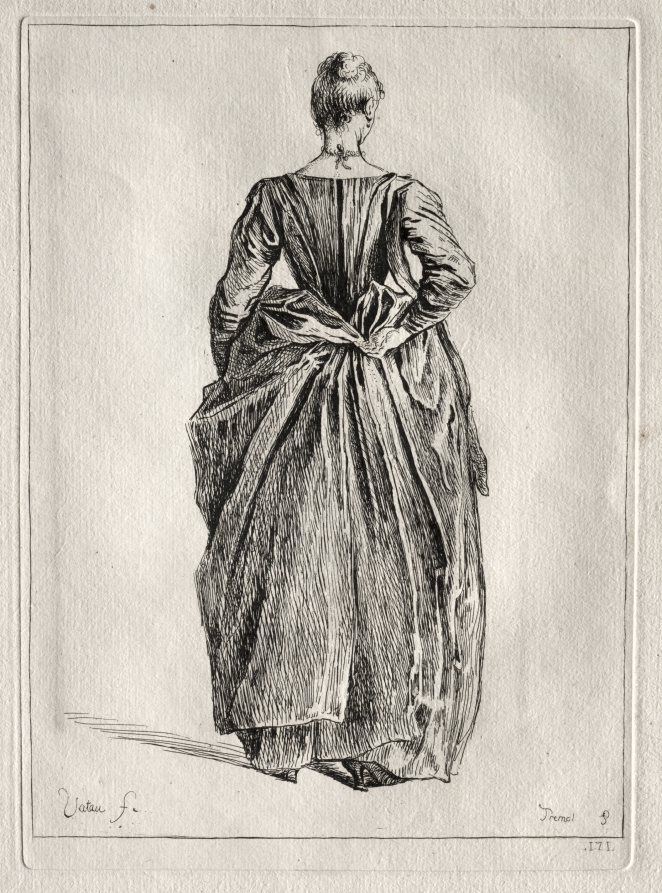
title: Study of a Woman from the Back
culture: France, 18th century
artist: Pierre Charles Trémolière (French, 1703–1739)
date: c. 1723–39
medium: etching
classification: Print